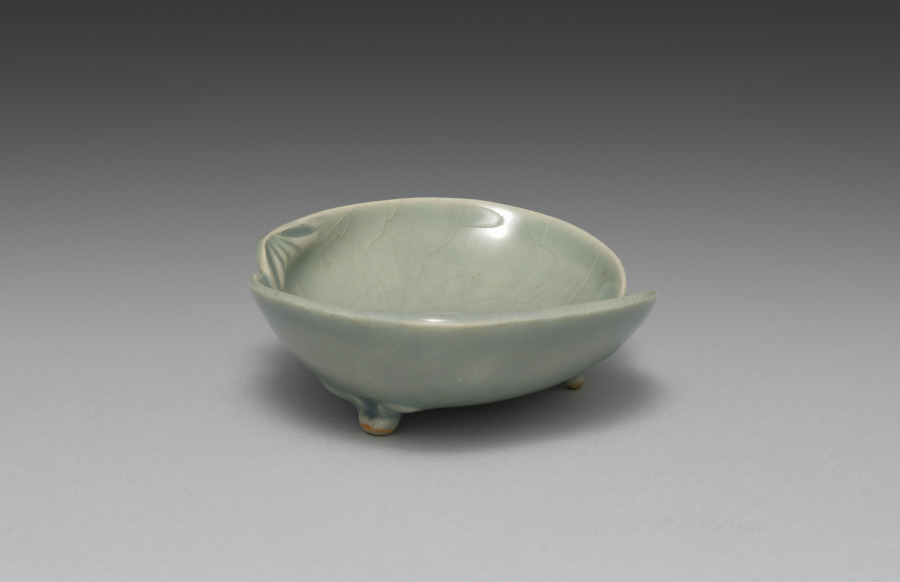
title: Dish from Saucers with Matching Shells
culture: Japan, Meiji period (1868–1912)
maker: Seifū Yohei III (Japanese, 1851–1914)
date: 1893–1914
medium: Porcelain with molded design and green crackled glaze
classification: Ceramic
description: Yohei III’s main output for his sophisticated clientele was in the form of tea sets and dining sets. He created a range of dishes in green glazes. He often produced in pairs, sets of five, or sets of ten. The set of five dishes with a more complex form is described as having a “water-colored glaze” (mizuiroyū). These are shaped like clam half shells, a reference to a game in which shell halves painted with narrative scenes or a variety of motifs must be matched back together by the players. The dishes have molded details to articulate the shell forms, and the crackling across each shell adds another dimension to the surface. Each dish is set on three small feet, formed by a pinched piece of clay and attached to an unglazed area on the underside of the dish. Curiously, while four of the dishes are stamped with the artist’s mark, one has instead a signature carved into the base.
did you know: Each of the paired-shell dishes has its own compartment in a long, flat box.